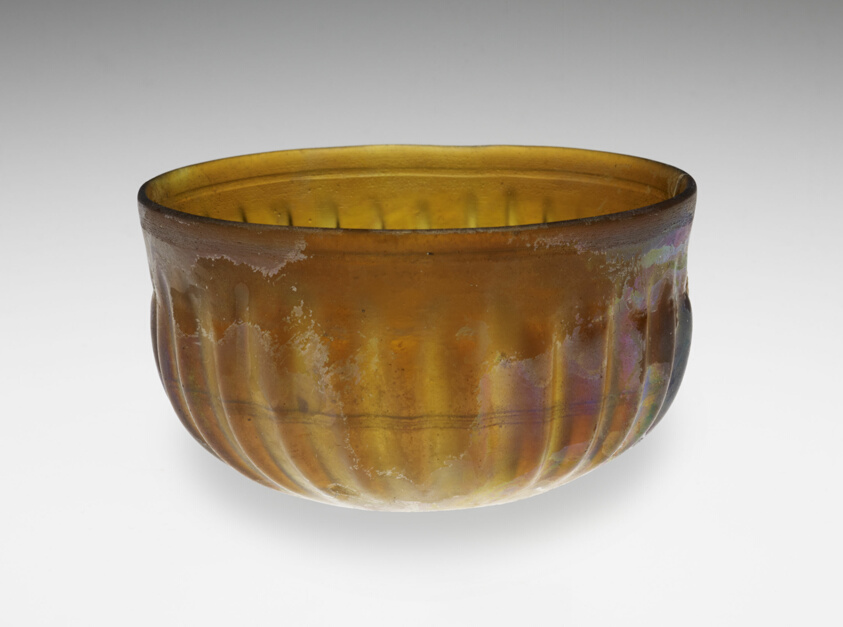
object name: Vessel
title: Bowl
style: syrian, ancient, roman (ancient, style or period)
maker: Roman; coast of Syria or Palestine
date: late 1st century BCE-early 1st century CE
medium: Glass, cast (sagged?)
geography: Syria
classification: bowl; glass; vessel; ancient art; container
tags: bowl, dining, drinking